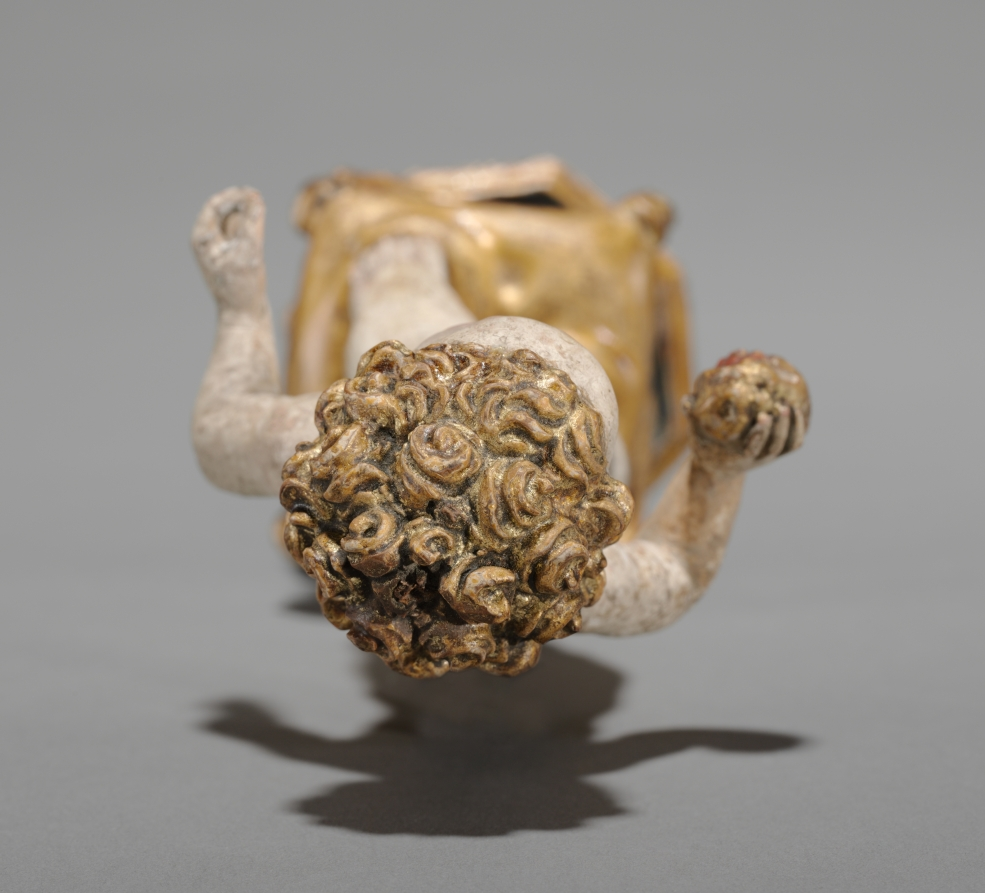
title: The Christ Child Holding a Pomegranate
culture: South Germany, 16th century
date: c. 1510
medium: painted wood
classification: Sculpture